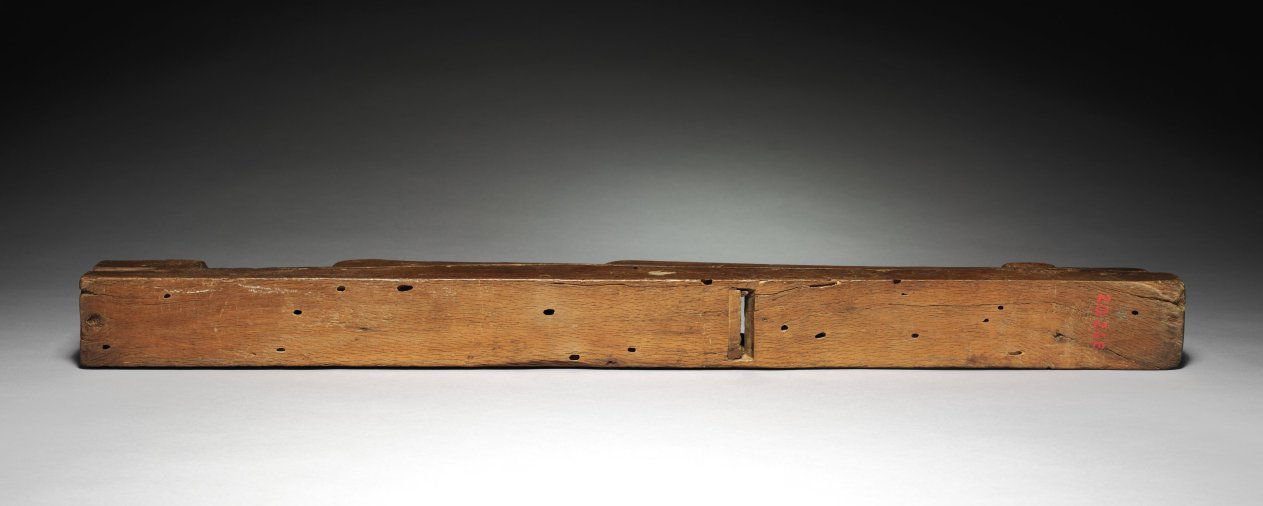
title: Plane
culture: Germany or Italy, 17th century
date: 1600s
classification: Tool